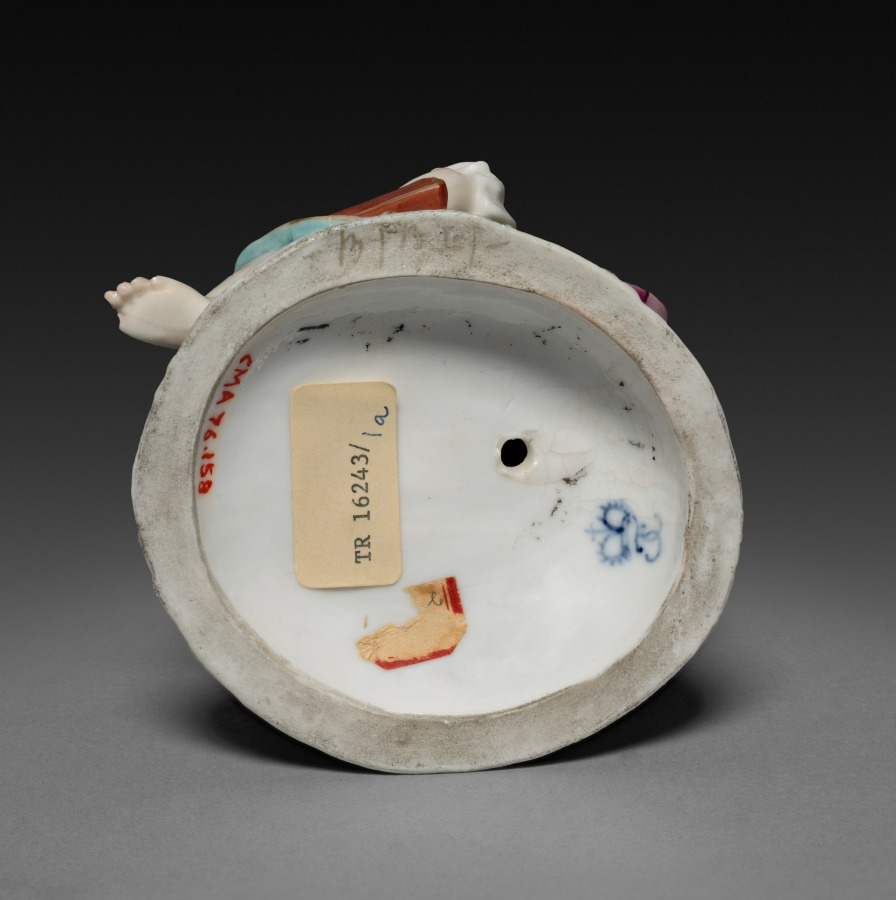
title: Girl Musician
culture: Germany, 18th century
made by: Frankenthal Porcelain Factory (German)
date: c. 1770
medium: porcelain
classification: Ceramic